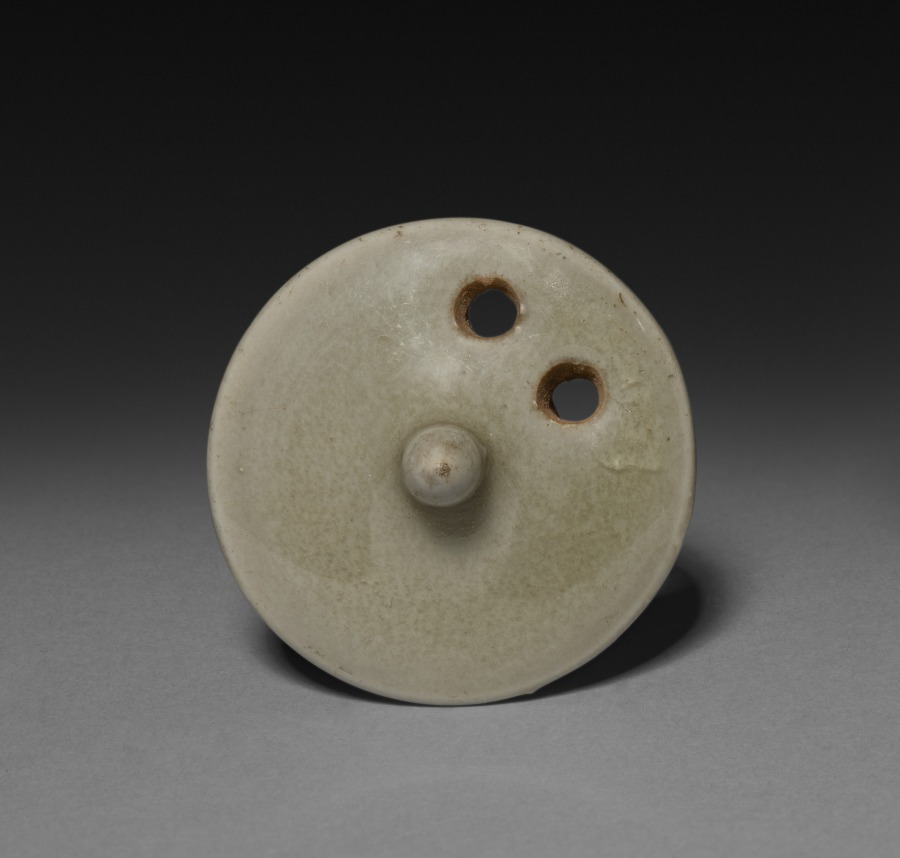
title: Wine Pot: Southern Celadon Ware (lid)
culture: China, Southern Song Dynasty (1127-1279) - Yuan Dynasty (1271-1368)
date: 1200s-1300s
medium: glazed buff stoneware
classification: Ceramic